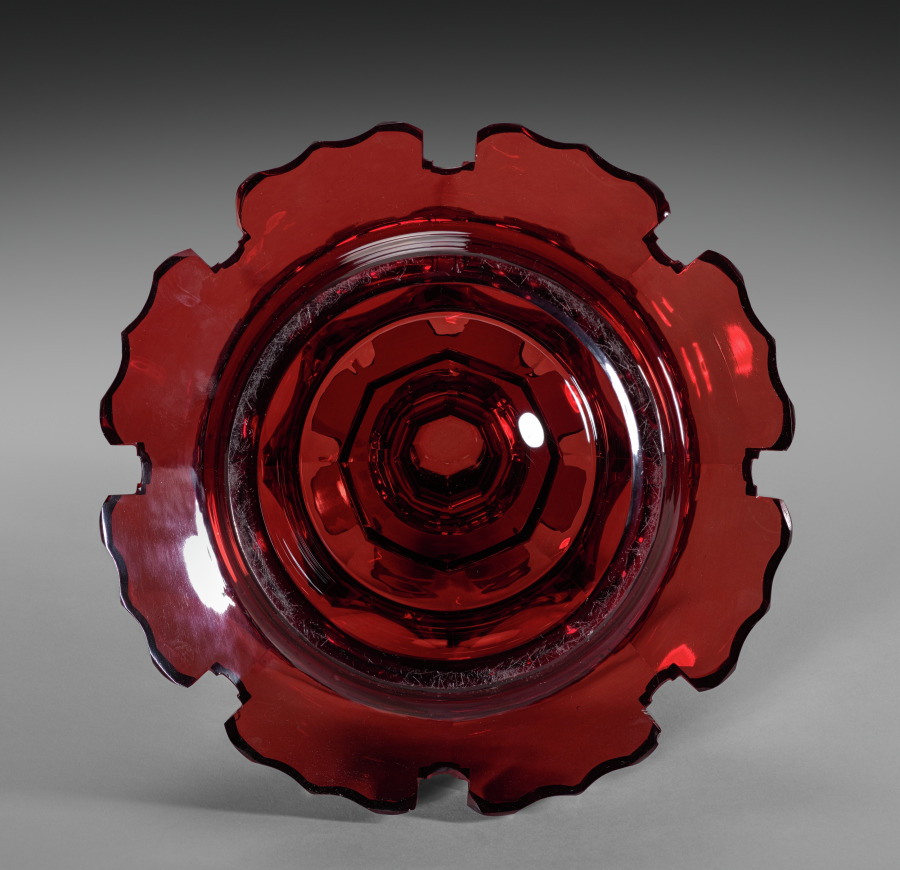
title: Cover for a Cup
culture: Bohemia, 19th century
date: mid-1800s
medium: ruby glass with engraved decoration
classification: Glass